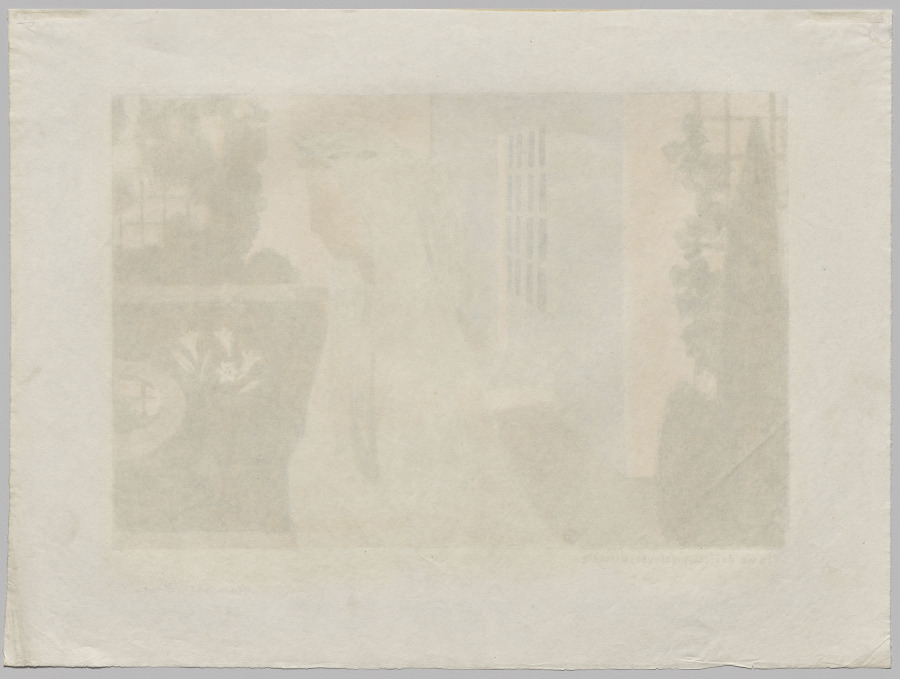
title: Life Becomes Precious, Discreet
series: Love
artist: Maurice Denis (French, 1870–1943)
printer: August Clot (French, 1858–1936)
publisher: Ambroise Vollard (French, 1867–1939)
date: 1899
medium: color lithograph on wove paper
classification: Print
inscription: Recto, lower left: “la vie deviant précieuse, discrete”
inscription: In graphite, recto, lower right: “Maurice Denis (signed)”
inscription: In graphite recto, lower right: “42”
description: Maurice Denis belonged to the Nabis, a group of artists who came together in 1889 to pursue a radical new style informed by subjective experience and emotion. This print is from a series in which Denis explored his devotion to his wife, Marthe, by depicting her in a variety of settings alongside titles drawn from his own journal. The vague but evocative images were meant to encourage the viewer to draw connections to the theme and meditate on its meaning.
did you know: Maurice Denis was a devout Catholic and often drew visual connections between his wife, Marthe, the subject of this print series, and the Virgin Mary.